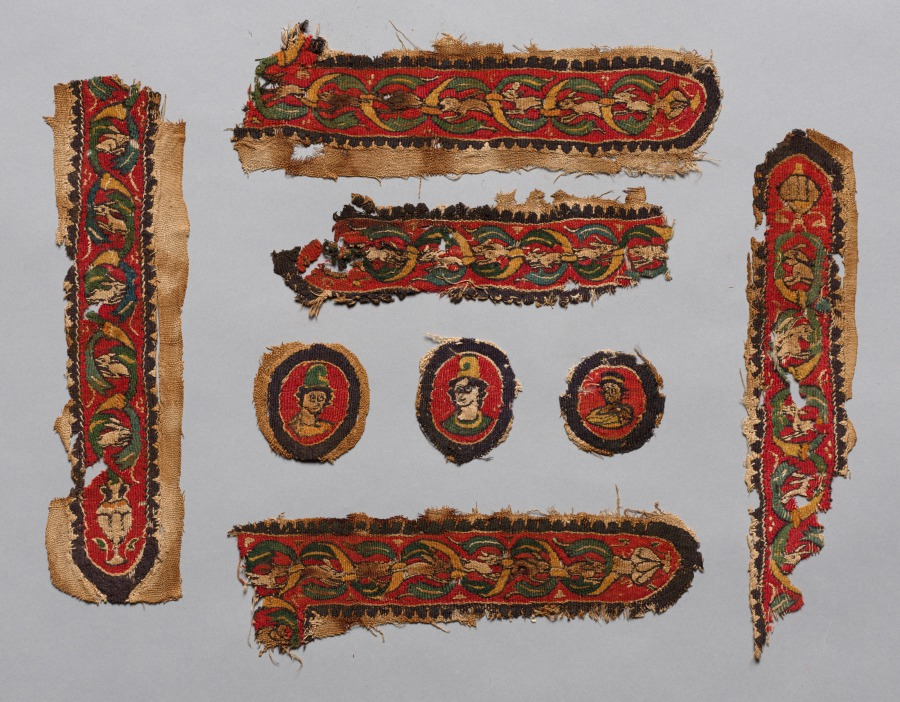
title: Fragments from a Tunic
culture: Egypt, 6th - 16th century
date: 500s - 1500s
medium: tabby weave with inwoven tapestry ornament, linen and wool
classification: Textile